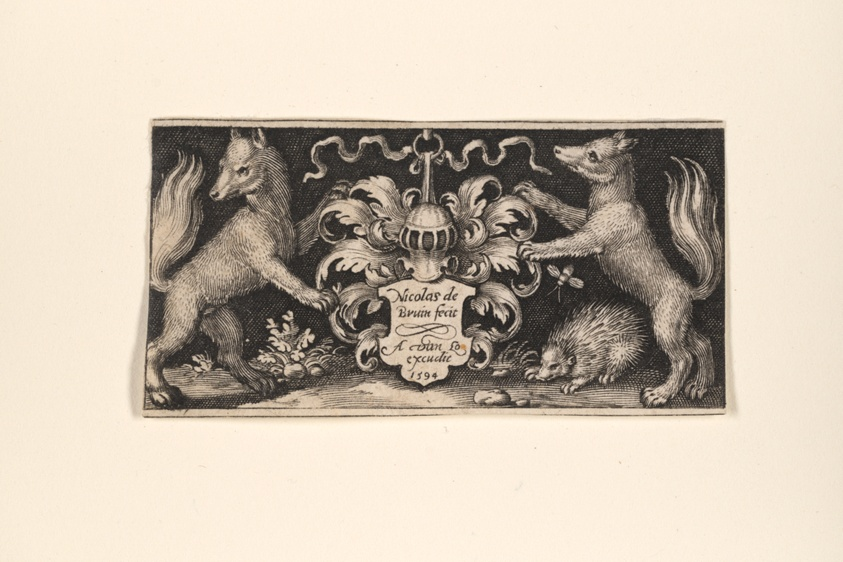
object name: Print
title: Title Plate with Two Foxes, from Fighting Chimeras and Scenes from Aesop's Fables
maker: Nicolaes de Bruyn (Flemish, 1571–1656)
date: 1594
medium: Engraving on paper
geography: Flanders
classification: engraving; paper; print; prints and drawing